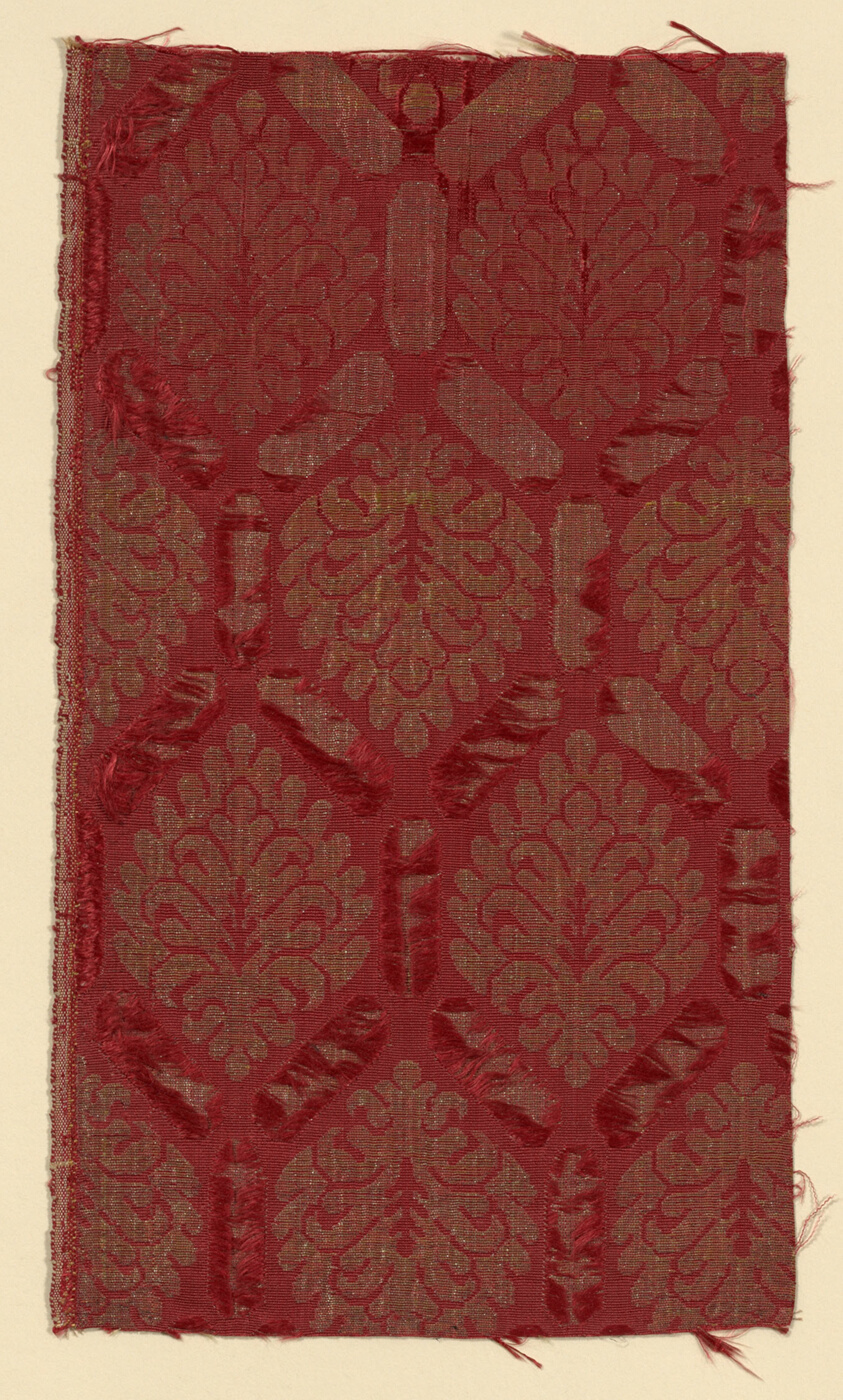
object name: Textile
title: Fragment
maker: Italy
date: 1625/75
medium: Silk and gold gilt strips, plain weave with supplementary patterning wefts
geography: Italy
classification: textile; weaving